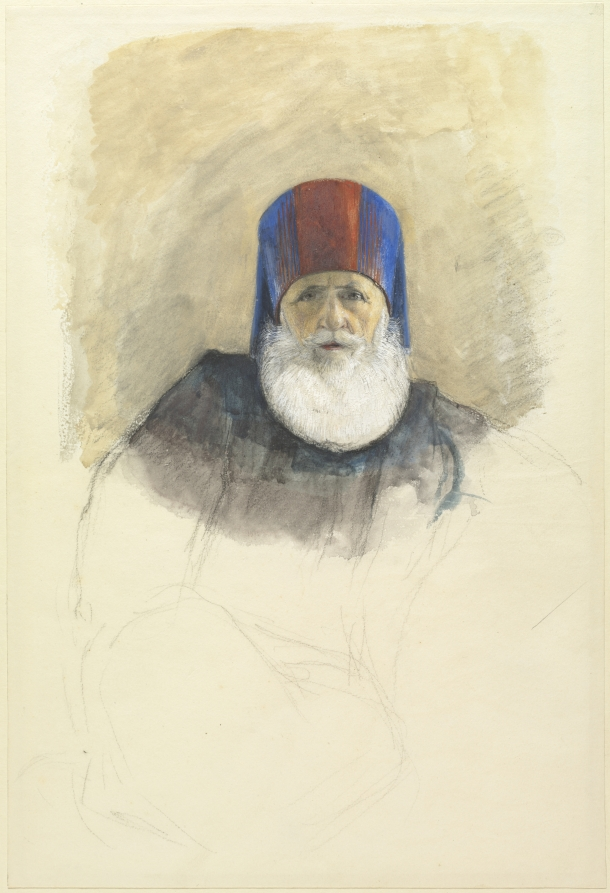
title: Study for Mehmet Ali Pasha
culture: England, 19th century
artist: John Frederick Lewis (British, 1805–1876)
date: c. 1844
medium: watercolor, gouache, black chalk, and graphite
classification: Drawing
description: This drawing was a study for a larger watercolor (now at the Victoria and Albert Museum) of Mehmet Ali Pasha, considered by many as the "Father of Modern Egypt." While European travel to the Middle East burgeoned during the mid 19th century, John Frederick Lewis was more intrepid than most, living and painting in Cairo for a decade. Upon his return to England in 1851, he astonished London audiences with more than 600 watercolors that conjured an exotic world of sumptuous colors and textures articulated in painstaking detail.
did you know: Lord Elphinstone, governor of Madras, described this drawing in an 1845 letter as "the best, and in fact, the only good likeness [of Mehmet Ali Pasha] I have seen, and I saw it within a quarter of an hour of leaving the original."